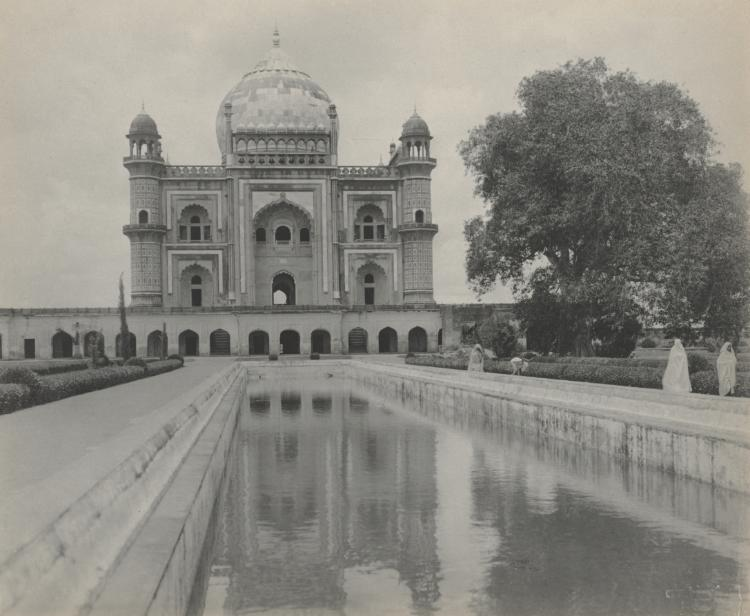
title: Saftar Jung Tomb, Delhi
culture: Ceylon, now Sri Lanka, 19th century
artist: A. W. A. Plâté Studio (Ceylonese)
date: c. 1890s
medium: platinum print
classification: Photograph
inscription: written in pencil on verso: "Delhi-Tomb of Saftar Jung Rit/x/L/ 2/8 1073 1073/7"